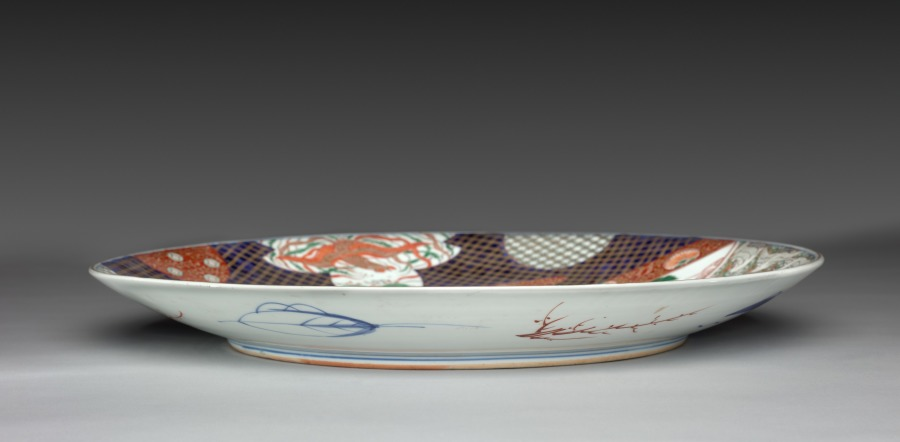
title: Dish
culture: Japan, Meiji period (1868–1912)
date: late 1800s-early 1900s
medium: overglaze enameled porcelain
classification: Ceramic